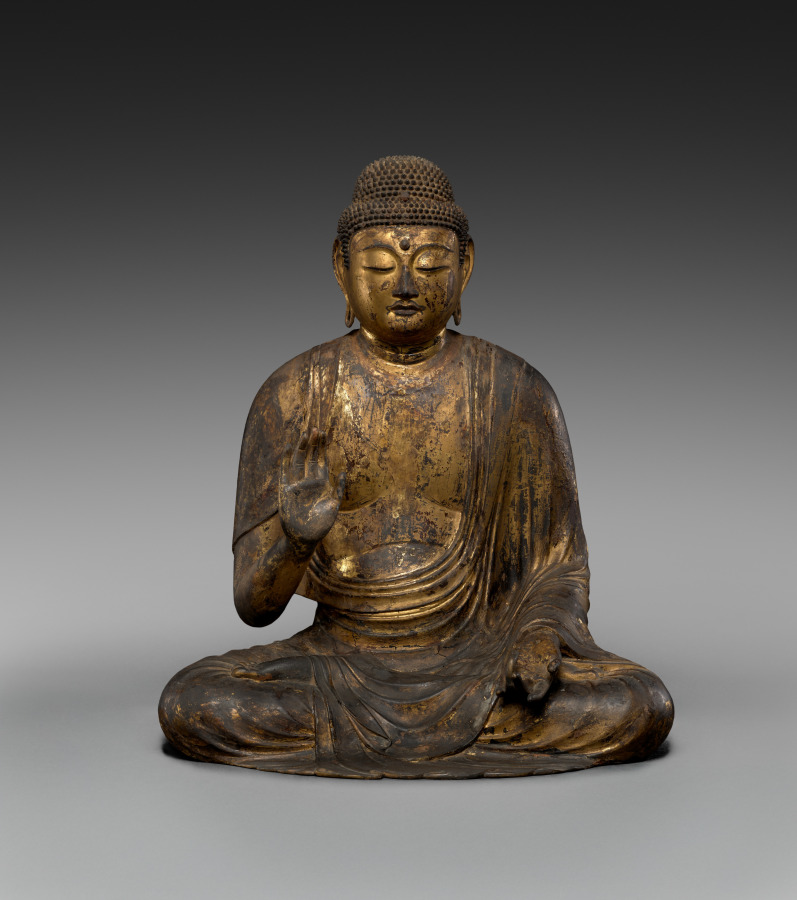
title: Seated Buddha (sculpture)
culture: Japan, Heian period (794–1185)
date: 1100s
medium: gilded wood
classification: Sculpture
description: Composed of a number of hollowed-out pieces of wood that were then covered with lacquer and gilding, this sculpture served as an image of worship in one of the small temples surrounding Kōfukuji, a major Buddhist temple in Nara, Japan. Like many Buddhas, this figure has its right hand positioned in a gesture meaning "fear not." The left hand is a replacement, so its original gesture, a clue to this Buddha's identity, is unknown. However, as the left foot is exposed over the garment, in lotus position, it may have been created as a Medicine Master Buddha, Yakushi Nyorai in Japanese, or the Buddha of our era, Shakyamuni.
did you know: This Buddha is sculpted in the Jōchō style, associated with the sculptor of the Amida at Byōdō'in in Uji.